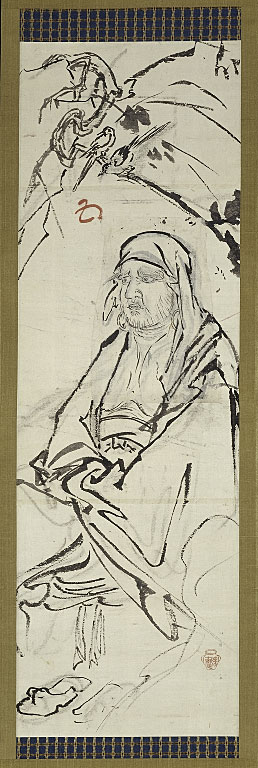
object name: Painting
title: Daruma (Bodhidharma), one of six sketches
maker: Kawanabe Kyosai; Japanese, 1831-1889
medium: Hanging scroll; ink on paper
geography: Japan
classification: hanging scroll; painting; asian art